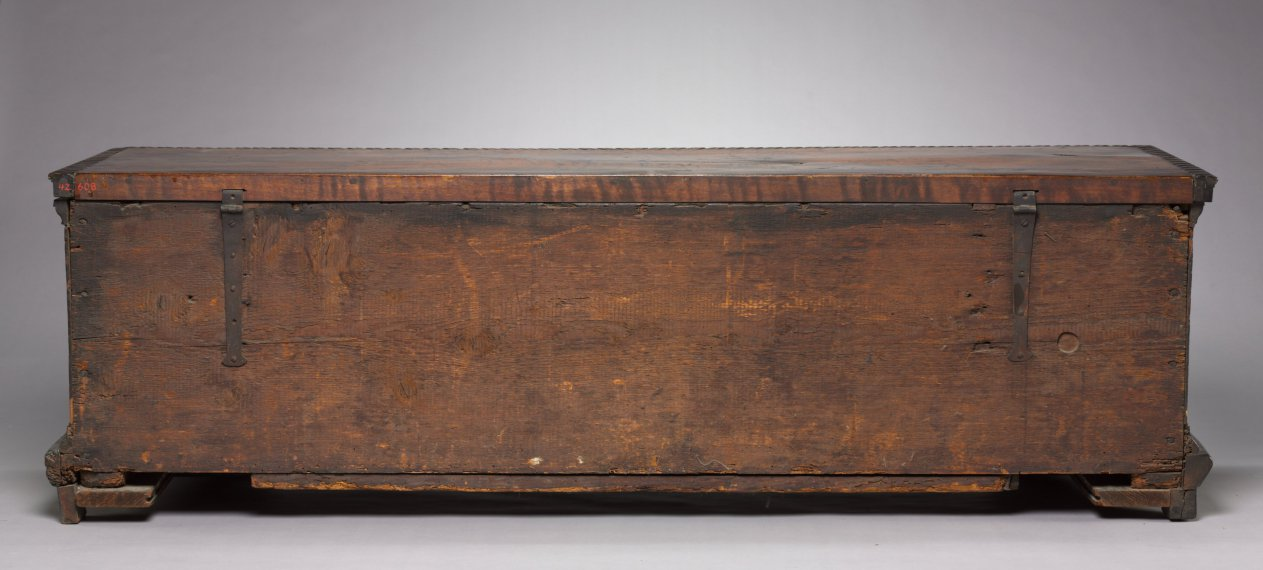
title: Cassone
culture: Italy, Venice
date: mid-1500s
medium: walnut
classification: Furniture and woodwork